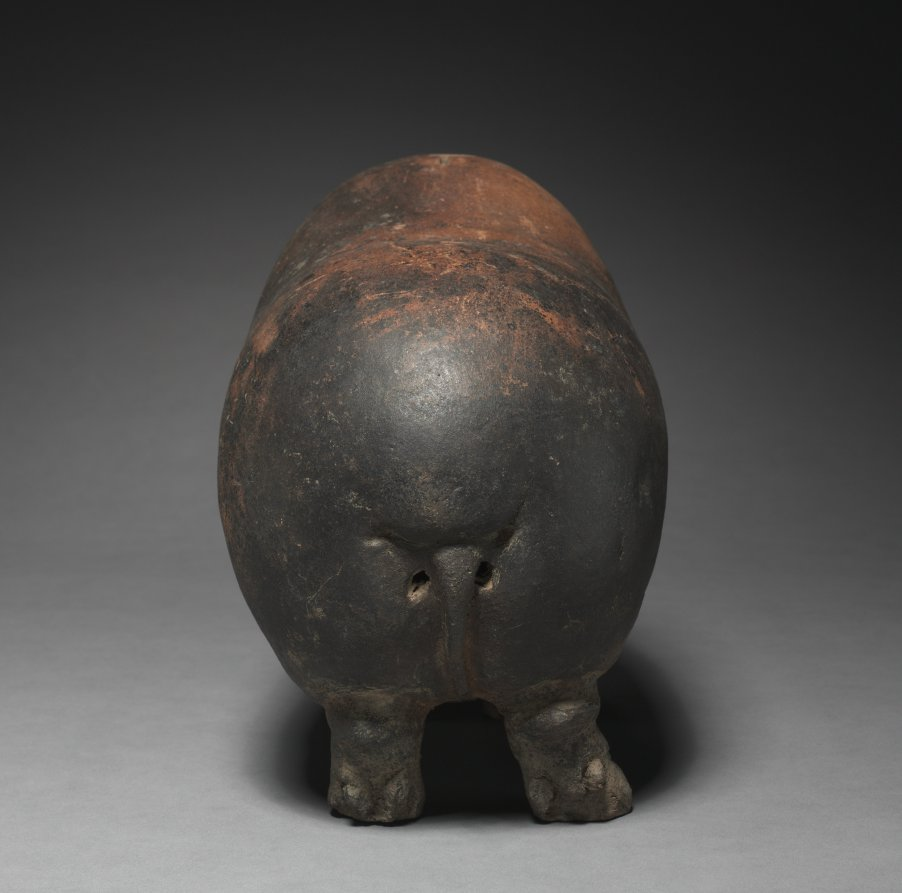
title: Piggy Bank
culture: Java, Majapahit Dynasty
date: 1300s–1400s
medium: terracotta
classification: Sculpture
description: Do I look familiar to you? My round and exaggerated form makes me perfect for storing precious coins, which could be inserted through the slot (now closed) on the hump of my back. My fierce expression is a warning to scare off any burglars, and the padlock and chain around my neck indicate my function as a personal bank. Yes, I am a piggy bank—a lucky one that has survived intact for over 500 years! Usually we end up broken by people who want our coins.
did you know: The word for piggy bank in Eastern Java is tjèlèngan, meaning ‘wild boar.’